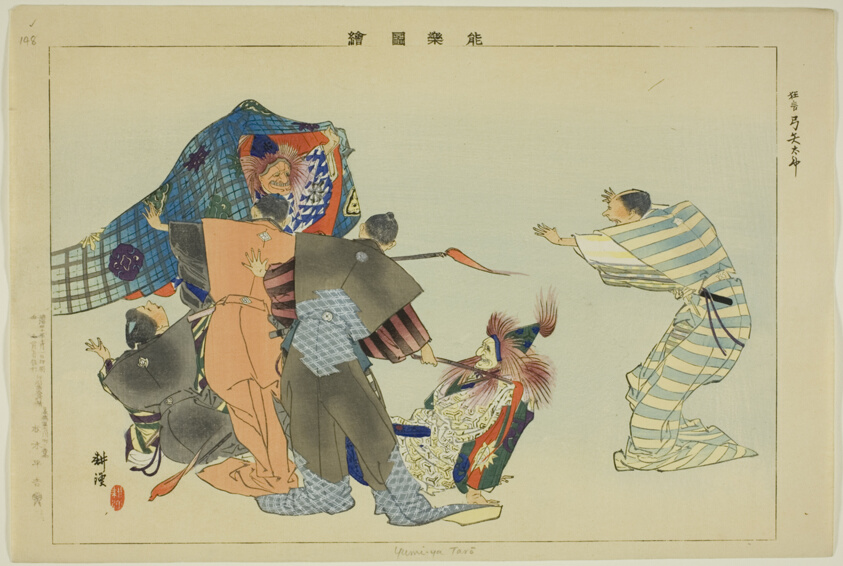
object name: Print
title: Yumi-ya Taro, from the series "Pictures of No Performances (Nogaku Zue)"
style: Japanese (culture or style)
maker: Tsukioka Kogyo; Japanese, 1869-1927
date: 1898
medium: Color woodblock print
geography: Japan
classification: woodblock print; print; asian art